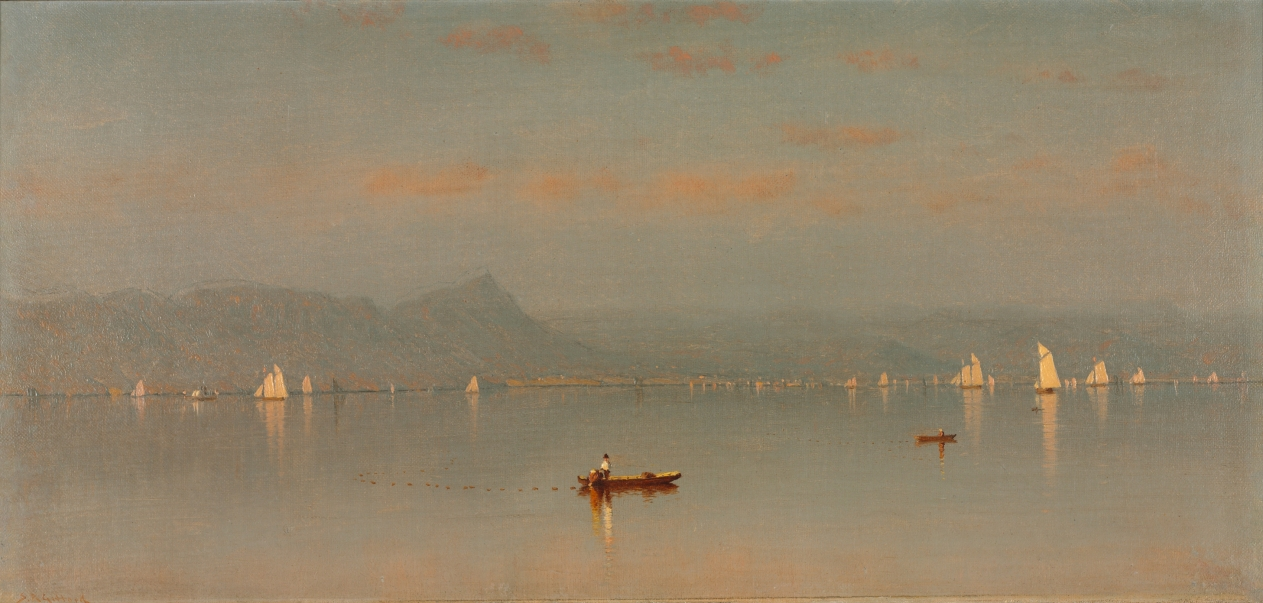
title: Haverstraw Bay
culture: America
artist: Sanford Robinson Gifford (American, 1823–1880)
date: 1868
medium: oil on canvas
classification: Painting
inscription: Signed lower left: S.R. Gifford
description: Located about 40 miles north of New York City, Haverstraw Bay is the widest point on the Hudson River. During the 1860s, it was a prime area for shad fishing, and Gifford’s painting records this activity taking place amid a delicately luminous morning haze.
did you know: Commercial and recreational fishing for now endangered American shad is currently prohibited on the Hudson River.